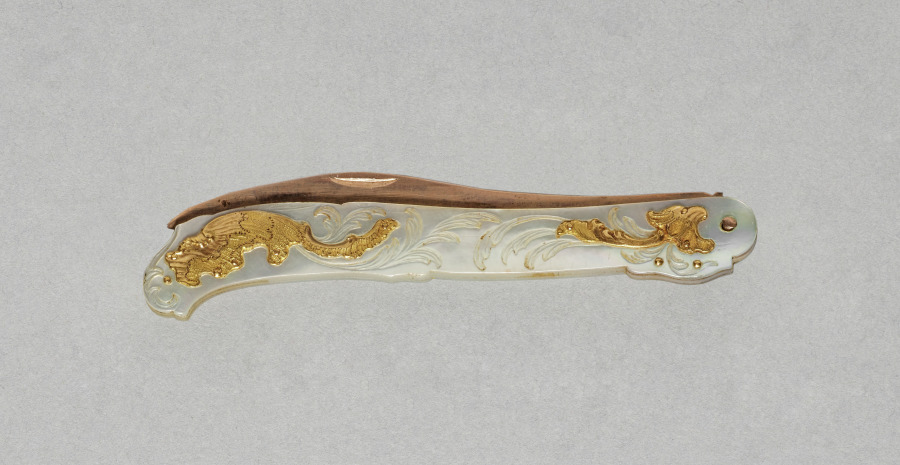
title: Pen Knife from a Sewing Box (Nécessaire)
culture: Austria, possibly Vienna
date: c. 1765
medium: gold and mother-of-pearl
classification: Miscellaneous